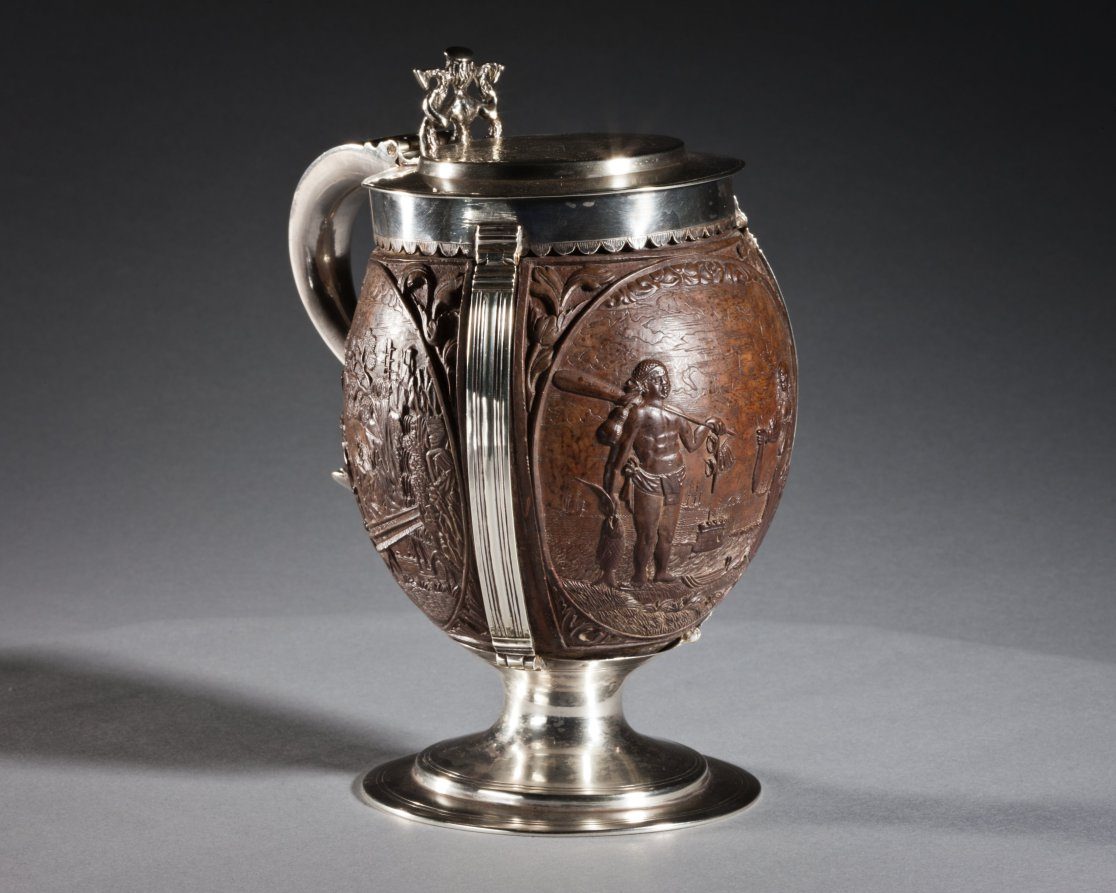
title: Coconut Cup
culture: carved coconut, probably The Netherlands; silver mount, probably England, 17th century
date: c. 1630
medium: carved coconut in silver mount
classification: Metalwork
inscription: top lid has engraved coat-of-arms, underside of lid has inscription: George Lewis TIVERTON Feby, 1st 1760.